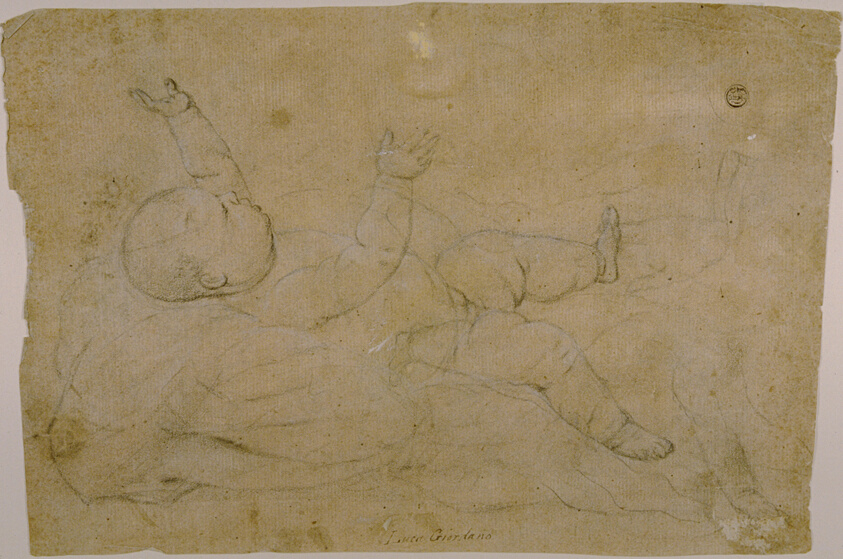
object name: Drawing and Watercolor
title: Reclining Child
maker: Attributed to Luca Giordano; Italian, 1634-1705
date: c. 1670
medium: Black chalk, heightened with white chalk, on ivory laid paper tinted pink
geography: Italy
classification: chalk; drawings (visual works); prints and drawing